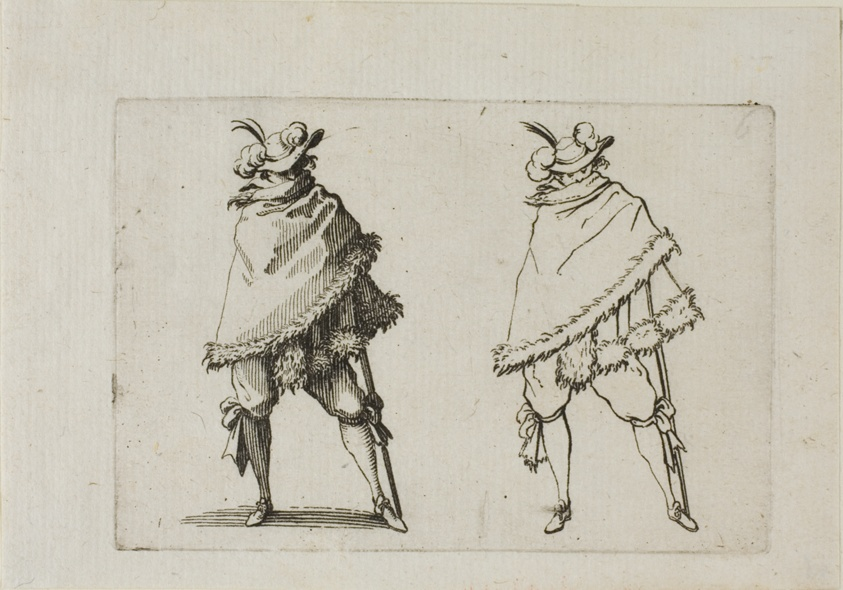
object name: Print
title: The Man Wrapped in his Coat, from The Caprices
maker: Jacques Callot (French, 1592-1635)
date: c. 1622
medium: Etching on ivory laid paper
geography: France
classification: etching; print; prints and drawing